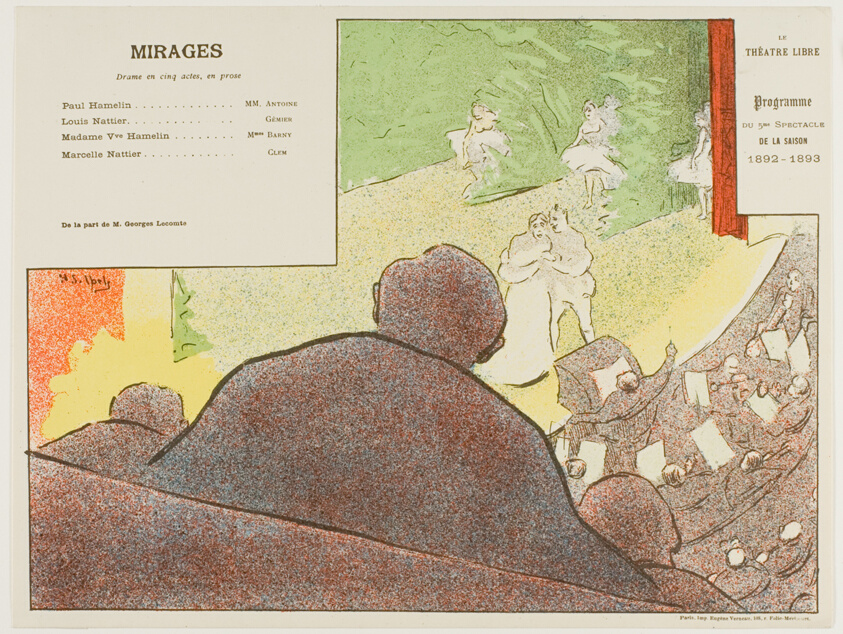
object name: Print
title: Fifth Performance: Mirages, for Le Théatre Libre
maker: Henri-Gabriel Ibels (French, 1867-1936); printed by Imprimerie Eugène Verneau (French, 19th century-1906)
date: 1892–93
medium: Color lithograph on ivory wove paper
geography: France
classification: lithograph; print; prints and drawing